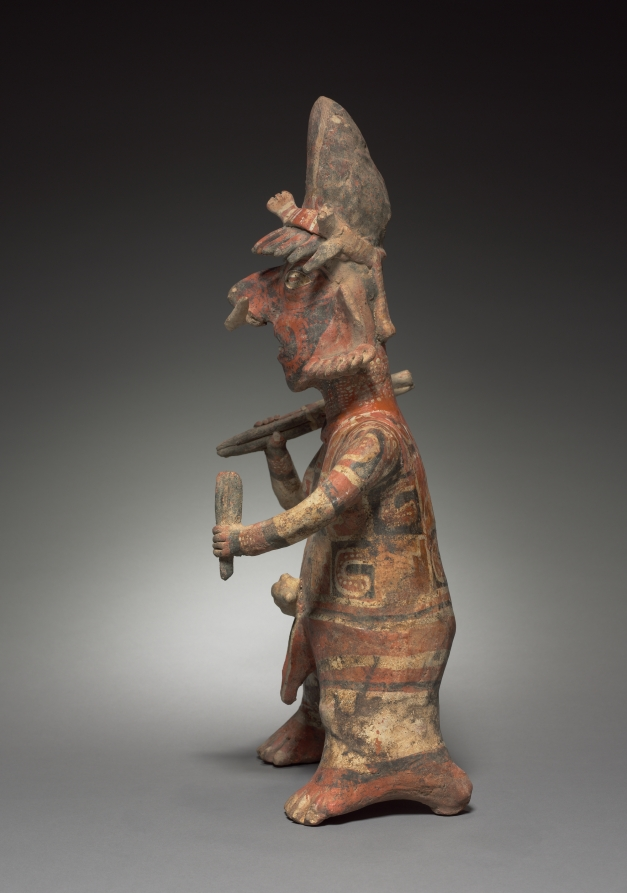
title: Standing Male Figure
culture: Mexico, Nayarit, Ixtlan del Rio Style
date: c. 100 BCE–300 CE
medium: earthenware with colored slips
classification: Sculpture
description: Like his female companion, this male figure is portrayed in all his finery. He carries spears, indicating that he is a hunter or warrior, and his confident grin conveys aggression and vitality.